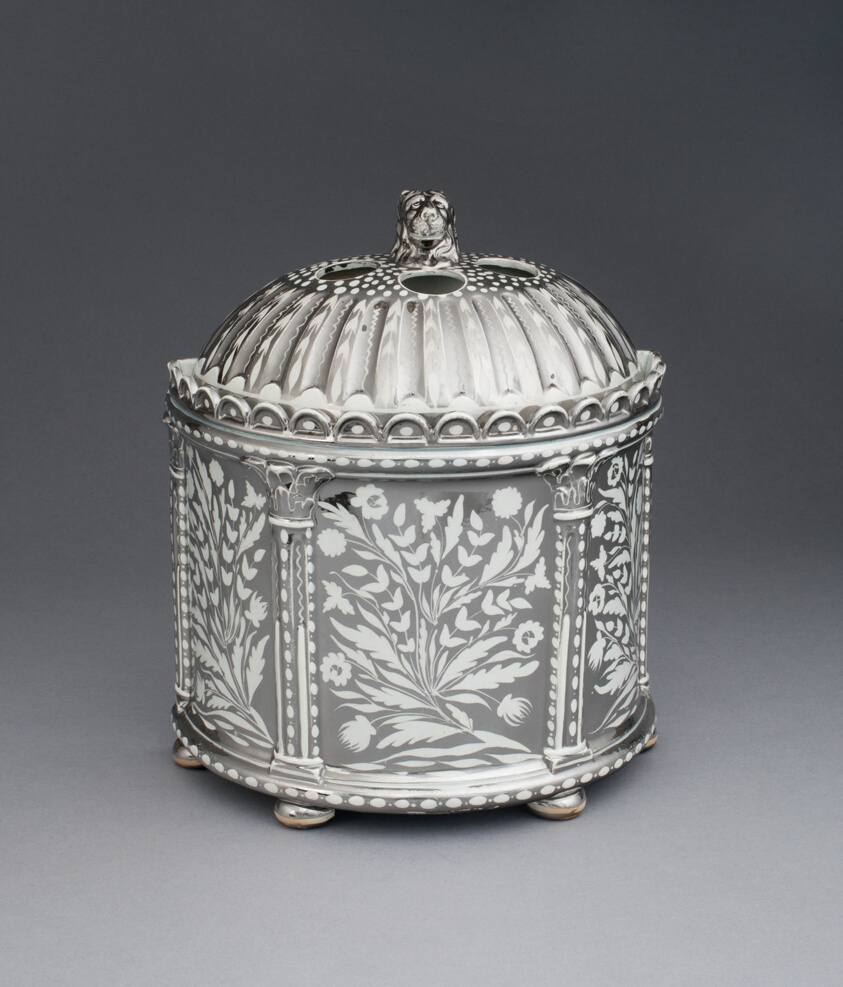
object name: Ceramics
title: Potpourri Jar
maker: England, Staffordshire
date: 1810/20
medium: Lead-glazed earthenware with lustre decoration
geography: Staffordshire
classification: porcelain; european decorative arts; ceramics